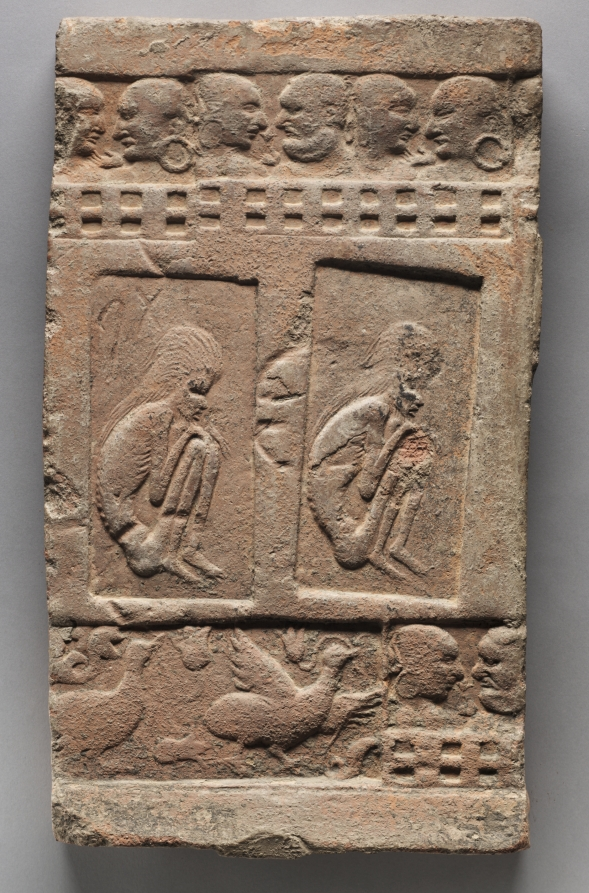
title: Seated Ascetics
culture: India, Kashmir, Harwan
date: 300s CE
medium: terracotta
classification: Sculpture